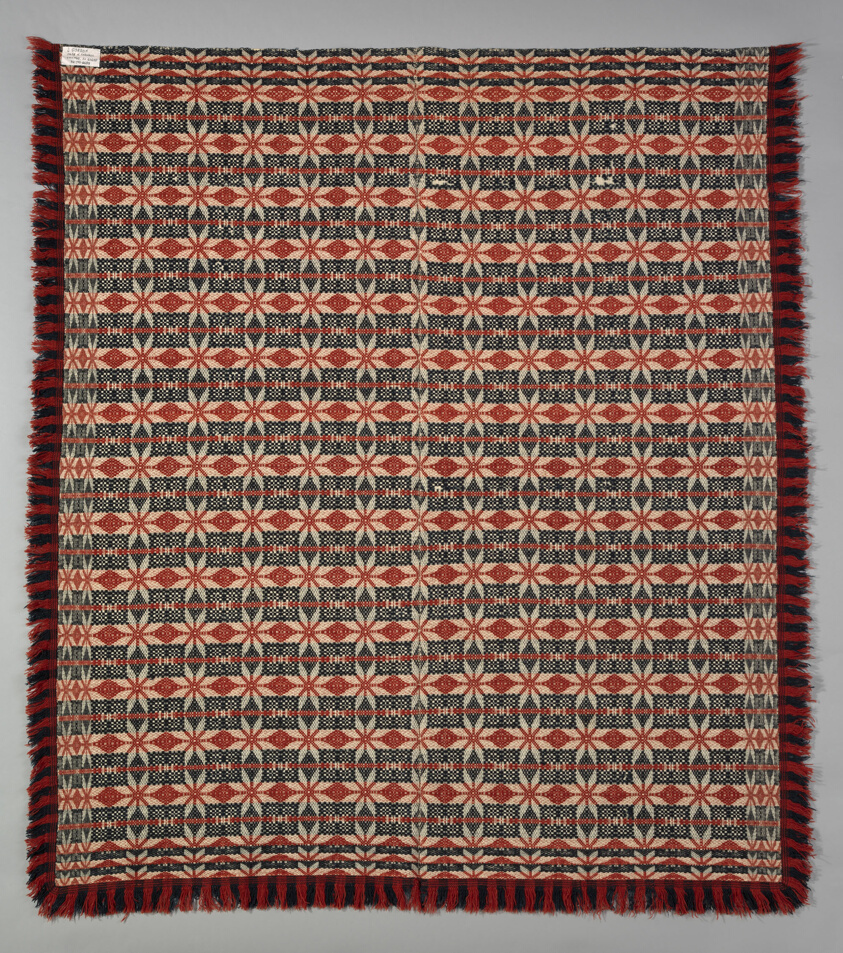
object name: Textile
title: Coverlet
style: American Fancy, 19th century, Star work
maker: United States, Probably Pennsylvania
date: 1820-40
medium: Cotton and wool, plain weave with supplementary wefts in composite point twill weave (star work, multiple shaft); two loom widths joined; with attached plain weave strip with weft fringe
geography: Pennsylvania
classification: weaving - coverlet; coverlet; weaving; textile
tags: geometric motif, diamond shapes, squares, stars, coverlet, star work